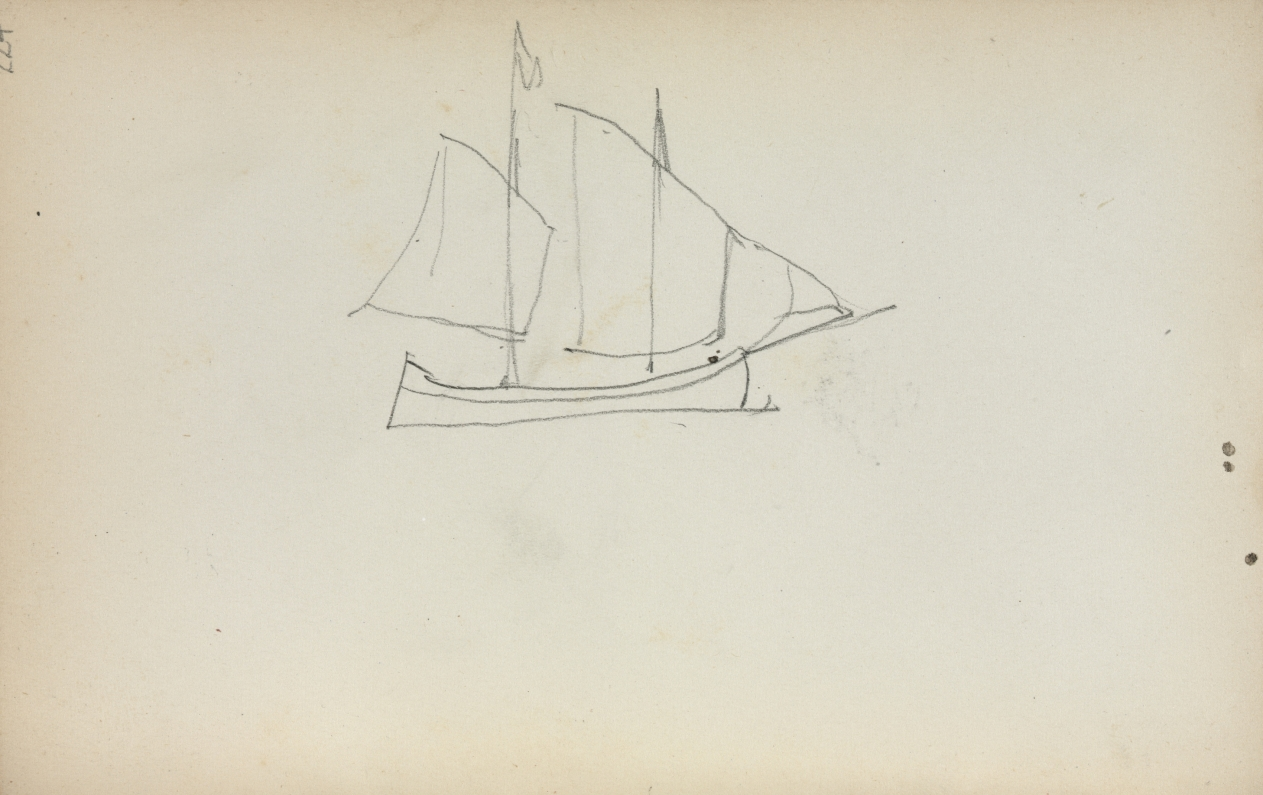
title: Italian Sketchbook: Sailboat (page 224)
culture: America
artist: Maurice Prendergast (American, born Newfoundland [now Canada], 1858–1924)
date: 1898–1899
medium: pencil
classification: Bound Volume